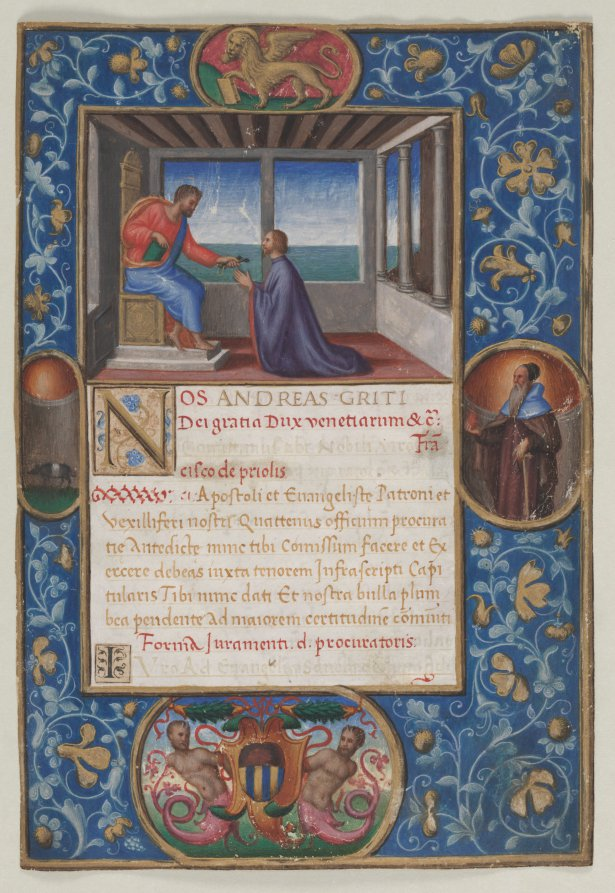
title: Leaf from a Commission: St. Mark Giving the Keys of Venice to Francesco de Priuli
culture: Italy, Padua and Venice, 16th century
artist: Benedetto Bordone (Italian)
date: c. 1523–1524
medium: ink, tempera and gold on vellum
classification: Manuscript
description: The miniature shows the enthroned figure of Saint Mark, patron saint of Venice, presenting the symbolic keys of Venice to the kneeling figure of Francesco de Priuli upon his appointment as Procurator of Saint Mark's. Beneath the miniature are twelve lines of text, the opening of a ducale issued by Doge Andrea Gritti (1523–38) announcing de Priuli's appointment, which was made in the early 1520s. The text begins, Nos Andreas Griti, Dei gratia Dux venetiarum (Our Andrea Gritti, By the Grace of God Duke of the Venetians). The illumination relates closely to the work of Benedetto Bordon, a Paduan-born miniaturist who became prominent in Venice. The decorative borders appear to be edged in thin gilt-bronze bars that give the illusion of fine metalwork. Four oval cartouches are occupied by the Lion of Saint Mark (top), the de Priuli arms (bottom), Saint Anthony the Great (right), and his symbol, a swine (left). The Priuli Arms below are festooned with wreaths and supported by mermen with horns and pink tails. This exquisite leaf exemplifies the changes in script, page layout, border decoration, and binding developed by the Italian humanist culture of the 1400s.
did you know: The coat of arms is supported by mermen, male mermaids, who are human from the waist up and fishlike from the waist down.